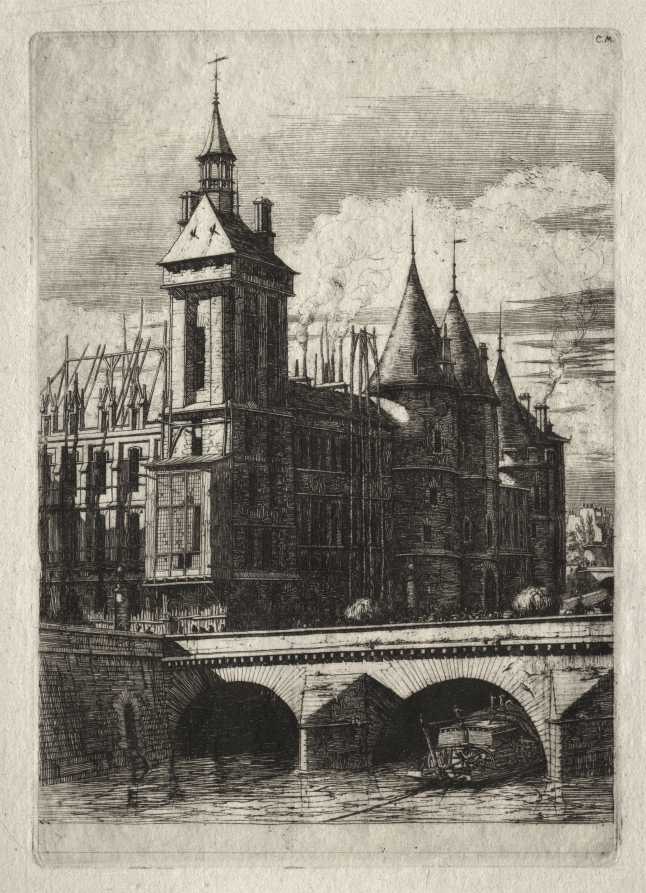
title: Etchings of Paris: The Clock Tower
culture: France, 19th century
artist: Charles Meryon (French, 1821–1868)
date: 1852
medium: etching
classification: Print